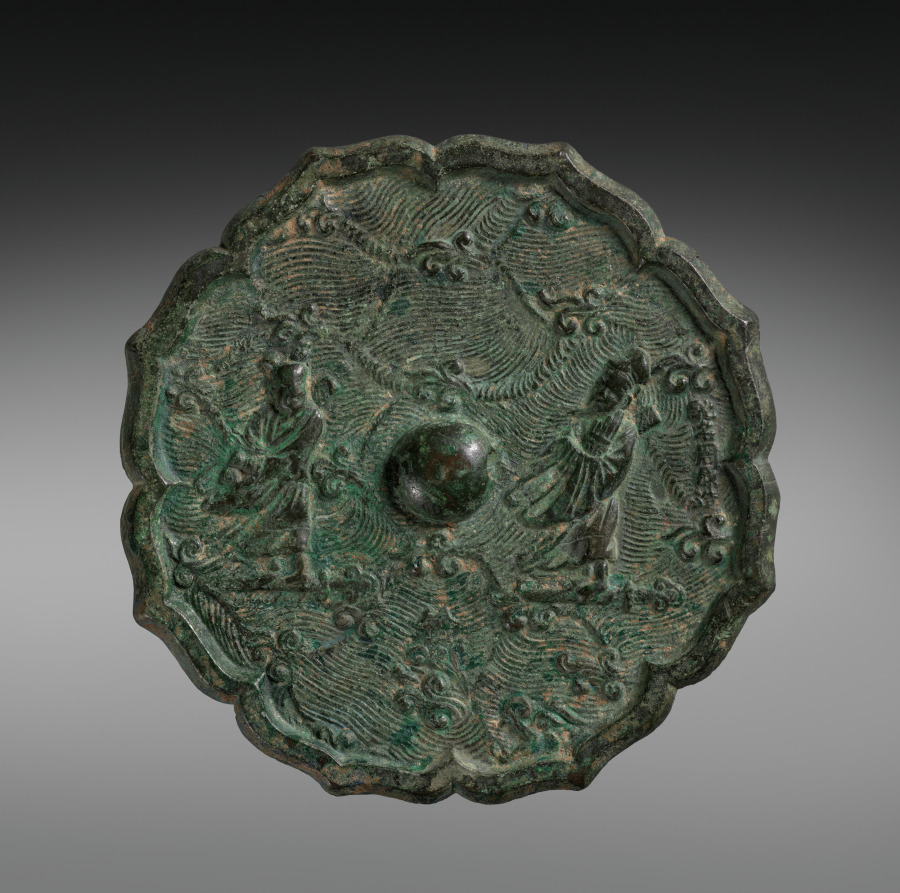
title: Octafoil Mirror with Two Immortals Crossing the Ocean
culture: China, Song dynasty (960-1279)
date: mid-900s–late 1200s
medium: bronze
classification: Metalwork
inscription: Made by the famous Zhou Yuan.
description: This mirror in the shape of a flower represents two immortals crossing the ocean, surrounded by surging waves. The younger figure on the left wears two buns on his head; the elder one with a long beard is carrying a musical instrument, sheng. The scene may illustrate “The Eight Immortals Crossing the Ocean,” in which their supernatural power to walk on water is depicted. The two men here stand on their swords to travel on water. In Daoist and Buddhist thinking, swords are considered powerful, magical implements to exorcise demons and destroy evil spirits.